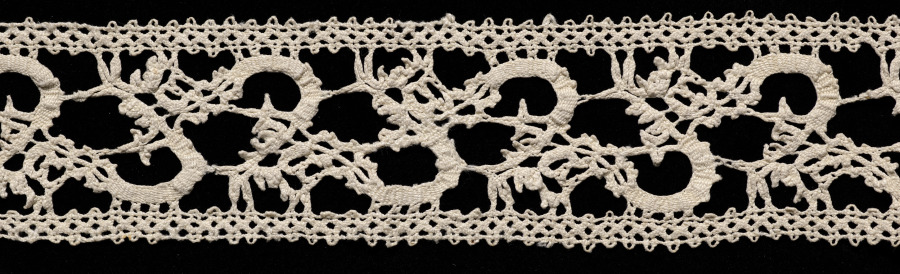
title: Lace Insertion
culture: Italy, Venice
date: 1600–1640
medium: Bobbin lace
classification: Lace